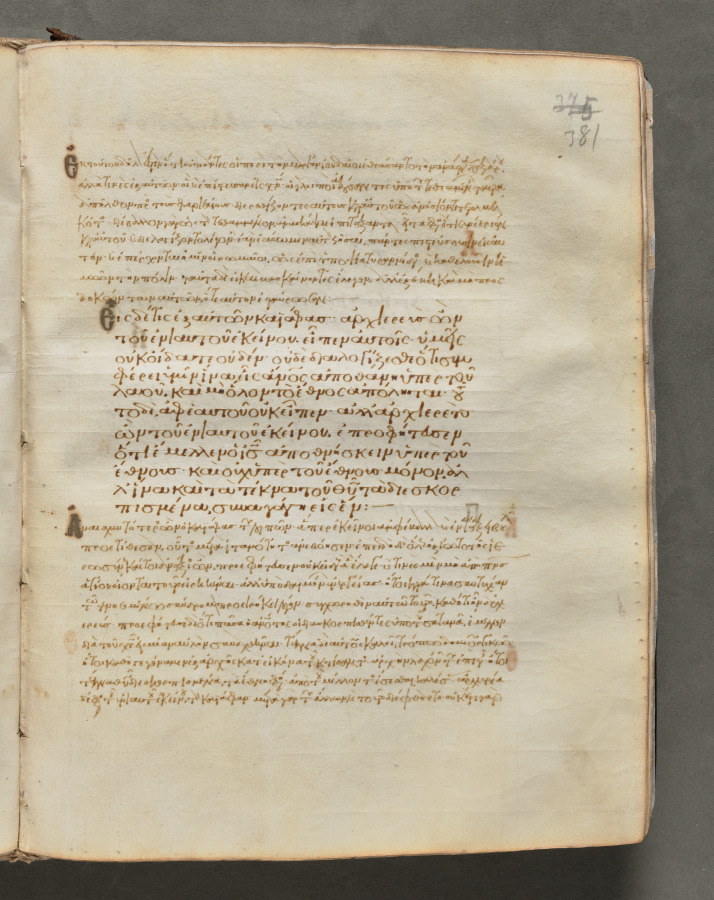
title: Text, folio 381 (recto), from a Gospel Book with Commentaries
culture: Byzantium, Constantinople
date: c. 1000–1100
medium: ink, tempera, and gold on vellum; leather binding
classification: Bound Volume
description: Each of the four gospels in this book opens on a page with brilliantly illuminated borders depicting the author of the text as well as birds—principally peacocks, symbols of the immortality of the soul—and fountains, representing the fountain of life and the salvation of the soul. This volume consists of 428 leaves with texts in Greek. Its level of sophistication suggests that it was probably written and decorated in a monastery in Constantinople.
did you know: Gospel books were carried in procession through Byzantine churches.